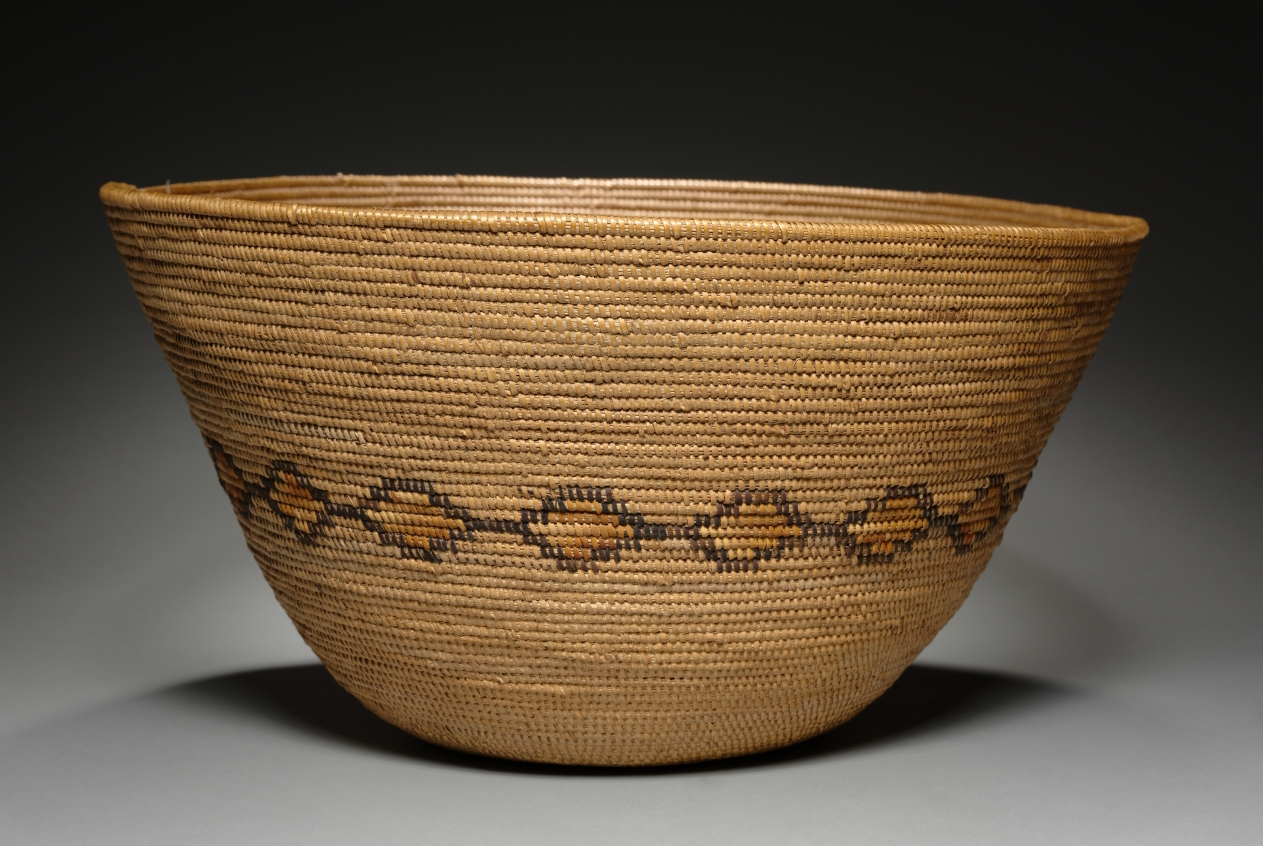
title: Food / Carrying Bowl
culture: California, Southern, Gabrielino (San Gabriel, Mission, or Tongva), 20th century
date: before 1929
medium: coiled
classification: Basketry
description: CMA Bulletin, December 1930